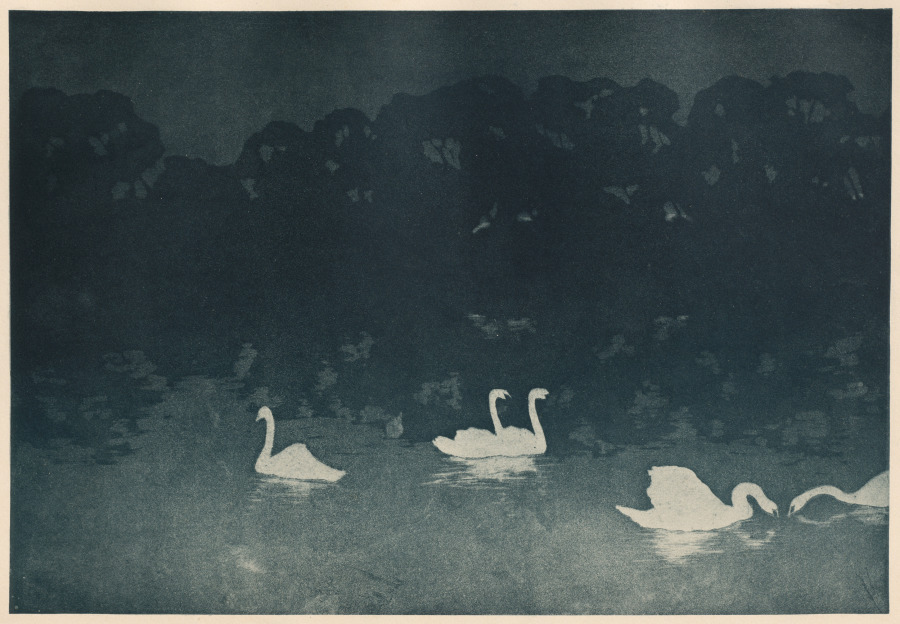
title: Les Cygnes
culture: France, Paris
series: L'Estampe Moderne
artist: Francis Jourdain (French, 1876–1958)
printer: Imprimerie Champenois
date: 1899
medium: Lithograph in blue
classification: Bound Volume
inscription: upper right corner of sheet: blindstamp of l'Estampe Moderne (Lugt 2790)